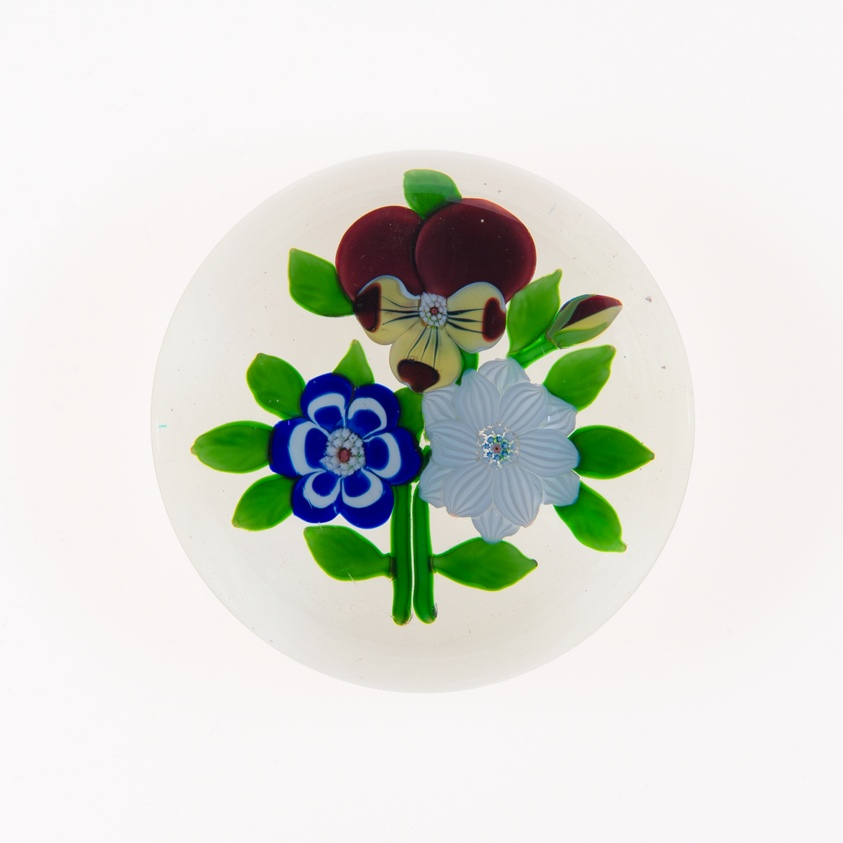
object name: Glass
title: Paperweight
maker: Baccarat Glassworks (Cristalleries de Baccarat); Lorraine, France, founded 1764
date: c. 1845–60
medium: Glass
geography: Baccarat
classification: paperweight; glass